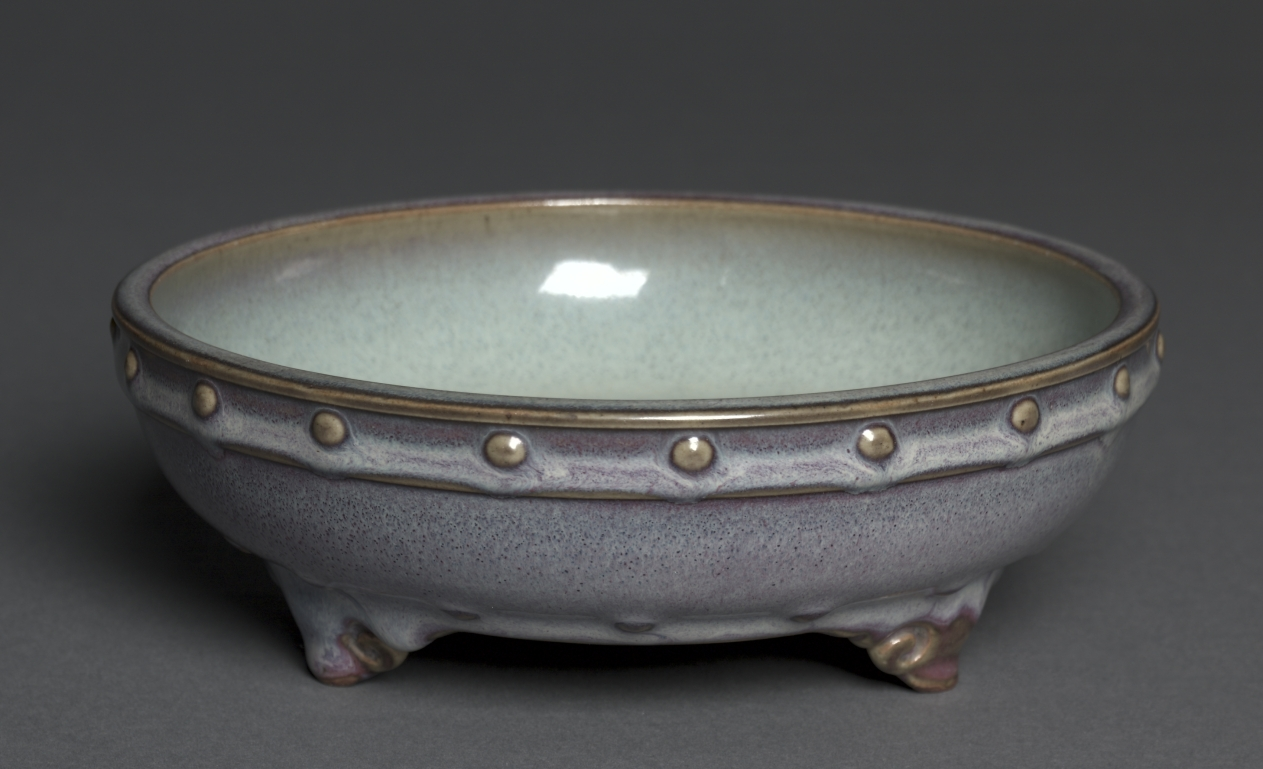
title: Bulb Bowl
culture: Northern China, Yuan dynasty (1271-1368) - Ming dynasty (1368-1644)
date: 1300s–1400s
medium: Porcelaneous stoneware, numbered Jun ware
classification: Ceramic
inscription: 六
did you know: The circle of 20 spur marks on base show where the bowl was supported during firing.